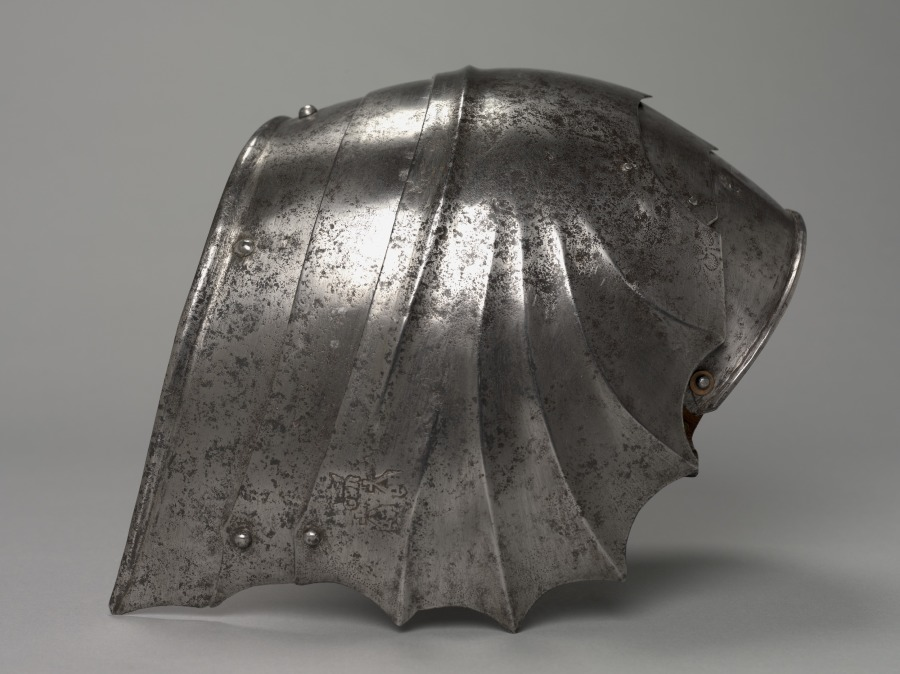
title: Pair of Gothic Fan-Shaped Pauldron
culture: Italy, Milan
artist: Antonio Missaglia (Italian, 1416/17–1495/96)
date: c. 1485–1500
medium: steel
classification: Arms and Armor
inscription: GAN, YA, YA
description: When the elements that made up a suit of armor had been forged, shaped, and polished, they were inspected for fit and finish. At this stage the master armorer would use a punch to stamp each element with his maker's mark. Other associated marks might include a town or guild mark, depending on the city of origin. The set of three marks shown here are of a type known to be Milanese. The upper mark seems to show three letters beneath a crown, while the mark below, twice repeated, is a split cross with the letters inside. These probably refer to the Missaglias.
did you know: A pauldron is a component of plate armor that covers the shoulder and often the armpit, and parts of the back and chest as well.